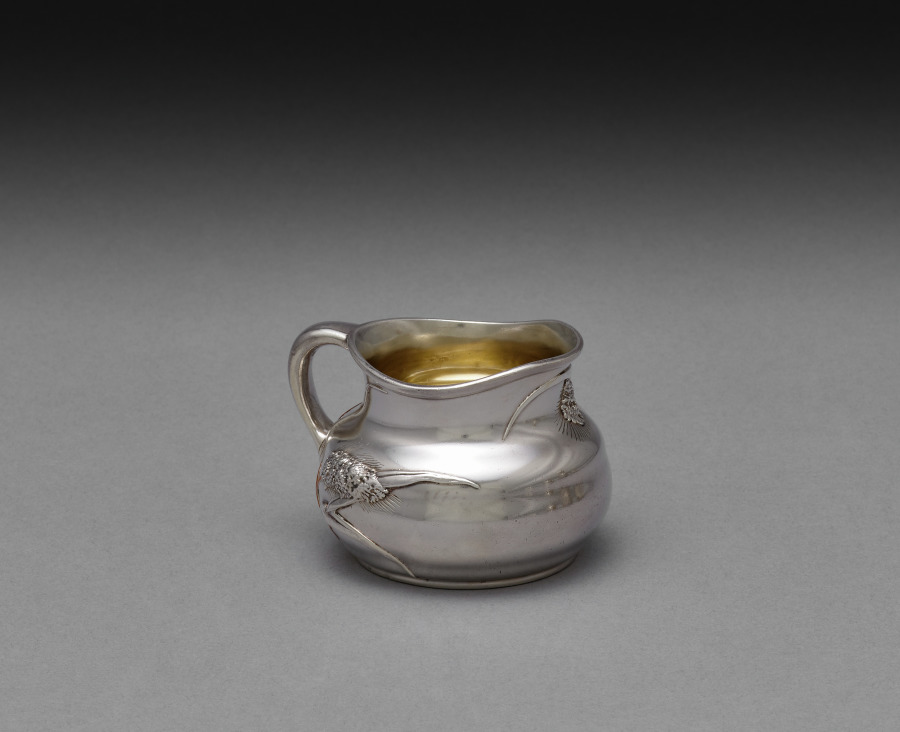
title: Cream Pitcher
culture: America, New York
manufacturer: Tiffany & Co. (America, New York, est. 1837)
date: c. 1879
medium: silver inlaid with copper and gold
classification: Silver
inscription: engraved: E.J.W.B./from/A.M./Xmas 1879. (The A.M. may refer to Alfred Morrison, a wealthy man who supported contemporary decorative arts by collecting them for his London house.)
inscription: Stamped underside: "Tiffany + Co.\ 5401 M 2987\ Sterling-Silver\ and-\other-\ metals\909".